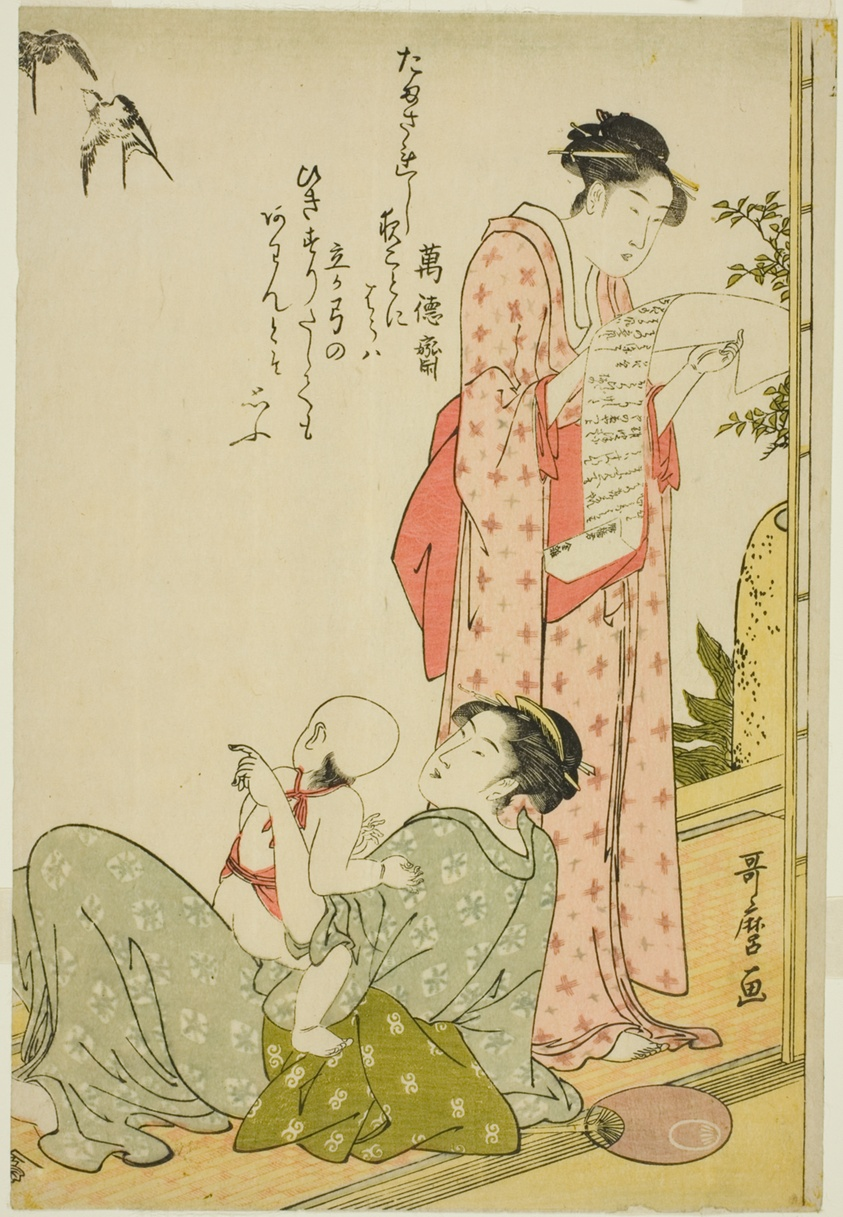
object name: Print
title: Girl Reading Letter while Mother and Child Gaze at Sparrows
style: Japanese (culture or style)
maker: Kitagawa Utamaro 喜多川 歌麿; Japanese, 1753 (?)-1806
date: c. 1791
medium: Color woodblock print; aiban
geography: Japan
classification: woodblock print; print; asian art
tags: mothers, babies, children